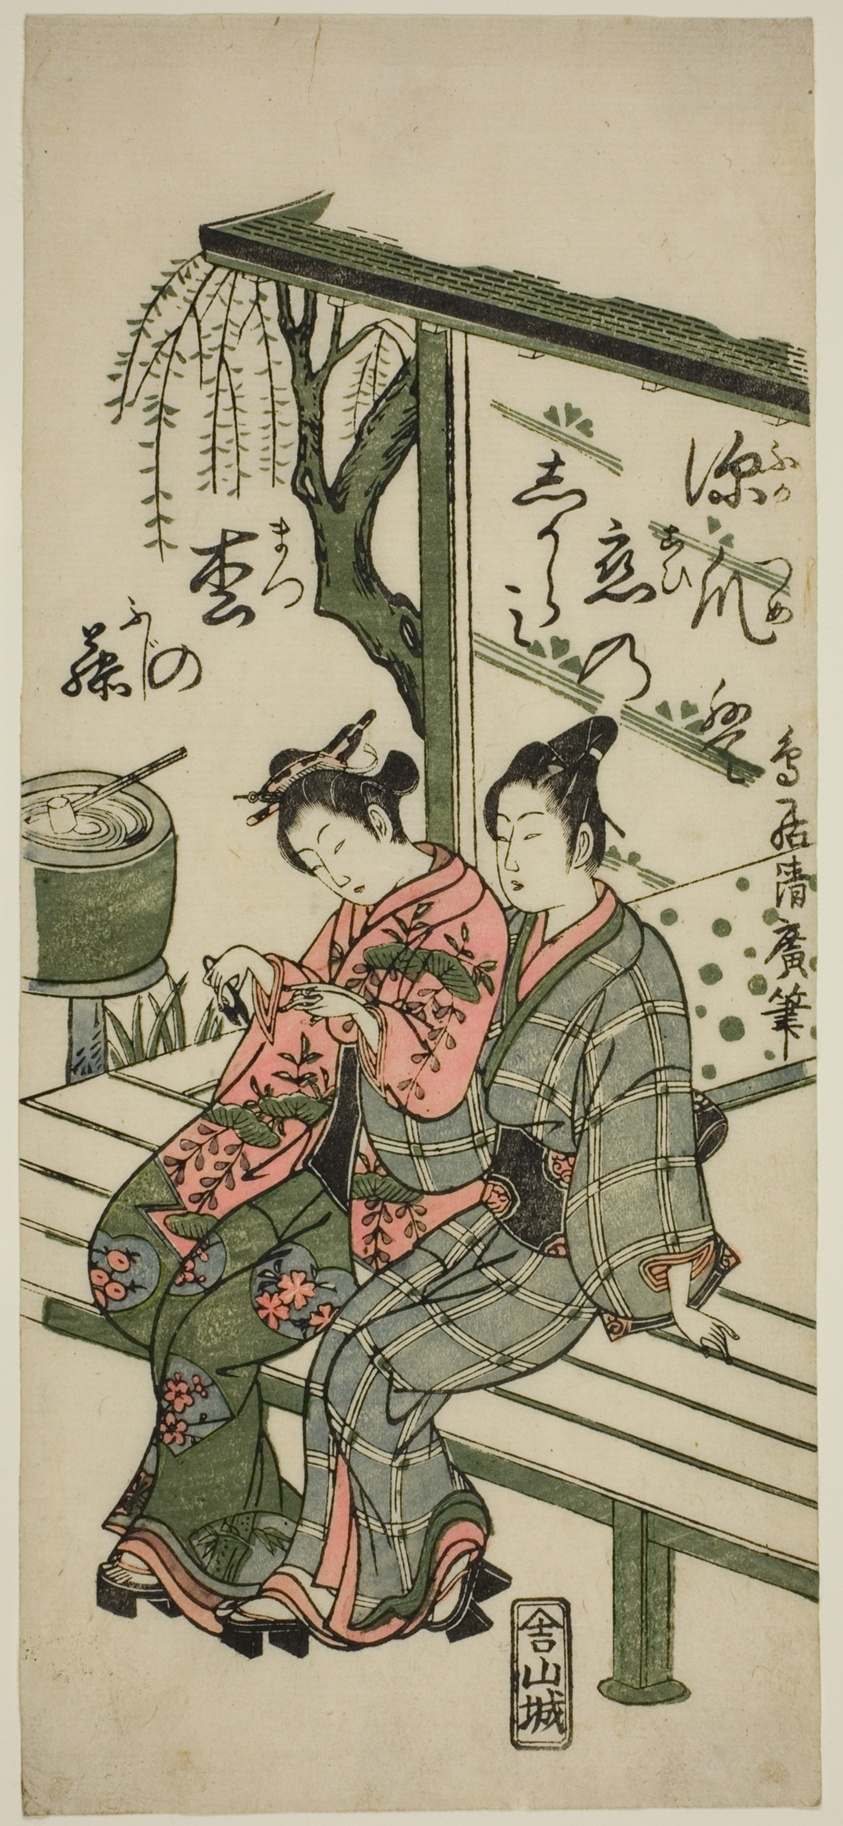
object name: Print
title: Lovers on a Veranda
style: Japanese (culture or style)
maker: Torii Kiyohiro (Japanese, active c. 1737-76)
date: c. 1760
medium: Color woodblock print; hosoban, benizuri-e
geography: Japan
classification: woodblock print; print; asian art